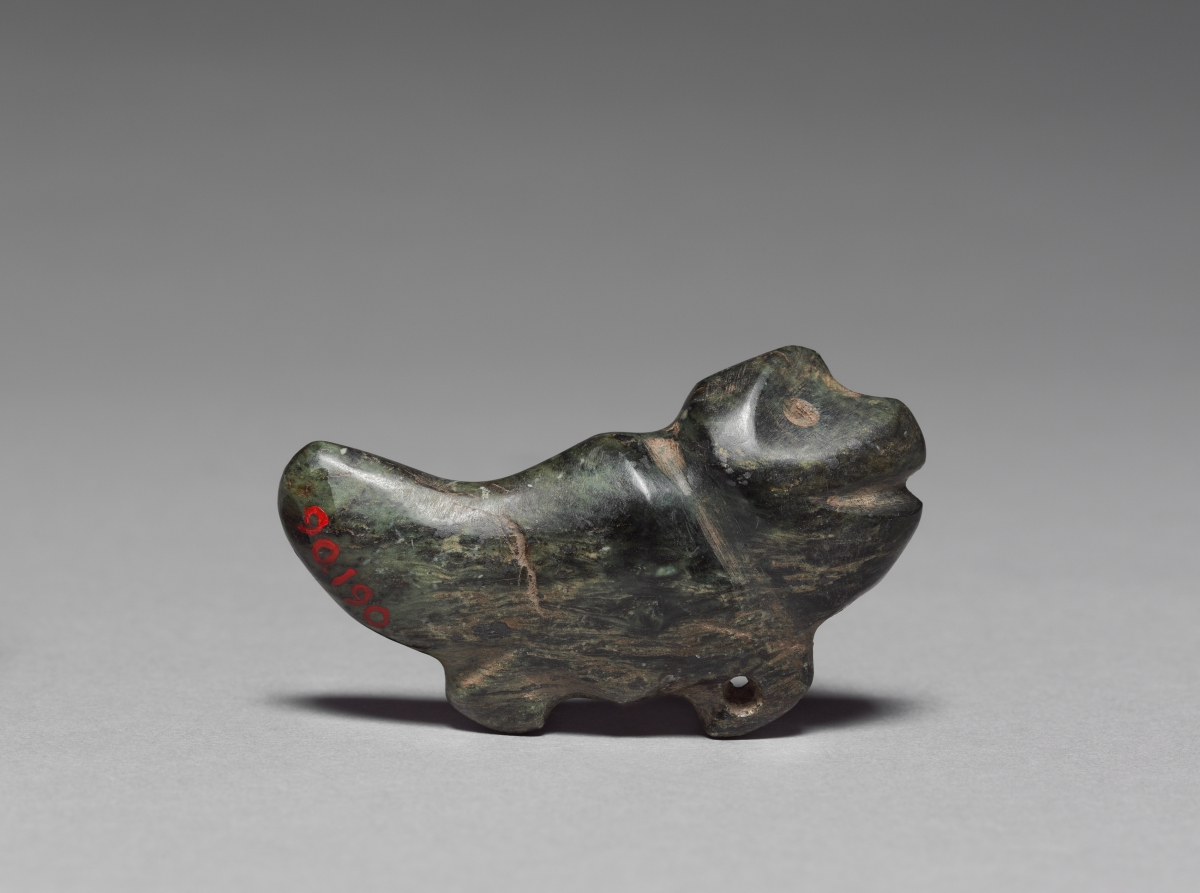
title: Fish Pendant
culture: Mesoamerica, Mexico, Guerrero, Mezcala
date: 100 BCE–300 CE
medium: serpentine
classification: Sculpture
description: The Mezcala style takes its name from a river in its homeland, the Guerrero region of western Mexico. The style is known for small-scale sculptures characterized by sleek abstraction and often made of greenstone, one of the most precious materials that Mesoamerican artists worked. Unfortunately, little is known of the sculpture's meanings and archaeological contexts.